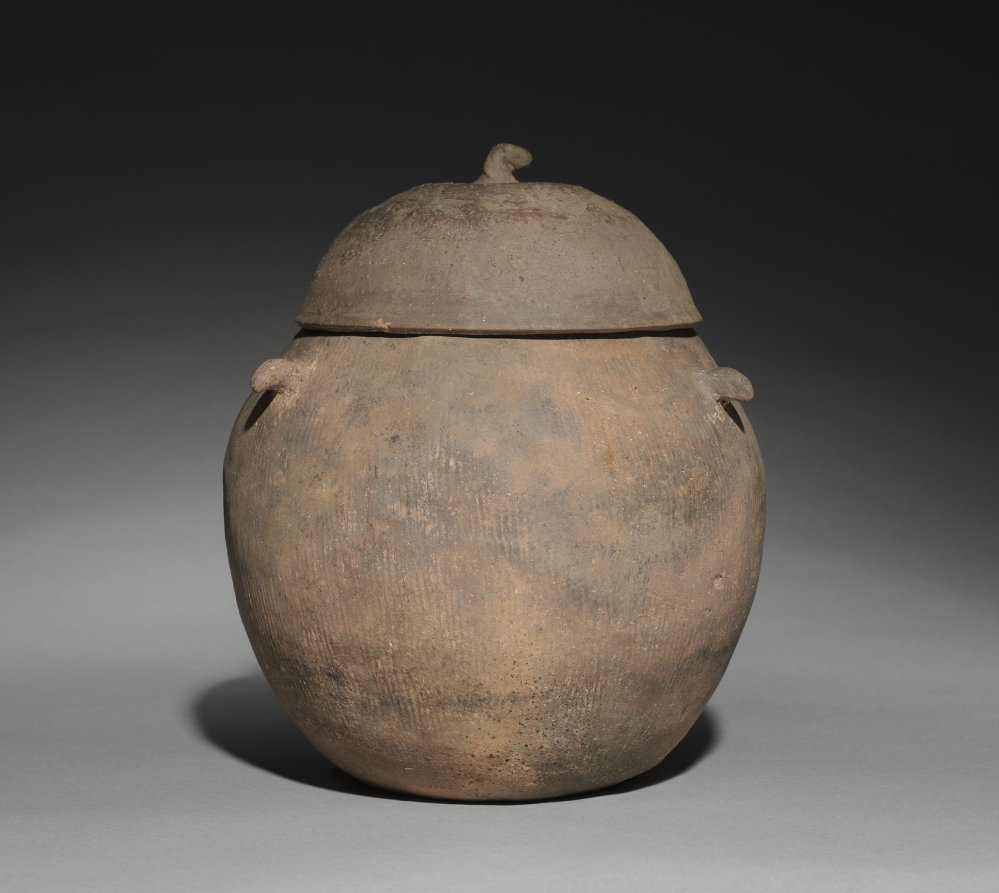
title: Lidded Jar with Four Horn Lugs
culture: Korea, Gaya period (42–562 CE)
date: 200s–400s CE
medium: earthenware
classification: Ceramic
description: Early earthenware from the Three Kingdoms period (57 BCE–668) became widely utilized as agriculture and religion grew to be essential elements in sustaining society and its systems. The clay jars of different sizes and shapes on display were made for the following purposes: some were used to store harvested grains and seeds, some to preserve cremated remains, and some to serve offerings in rituals.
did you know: This pottery vessel served to contain cremated remains, indicating the popularity of Buddhist mortuary practice in Korea during the Three Kingdoms period.